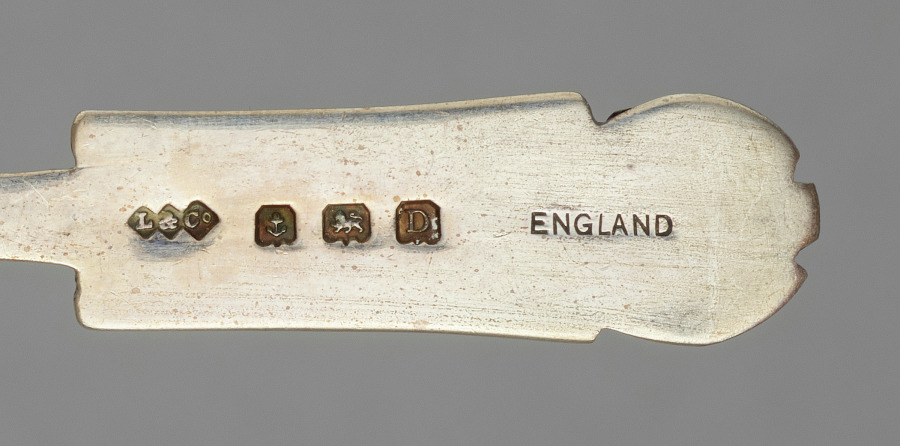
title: Set of six Spoons in Original Box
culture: England, London, 19th century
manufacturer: Liberty and Company (British)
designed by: attributed to Archibald Knox (British, 1864–1933)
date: c. 1895–1910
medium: Silver, enamel decoration and leather box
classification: Silver